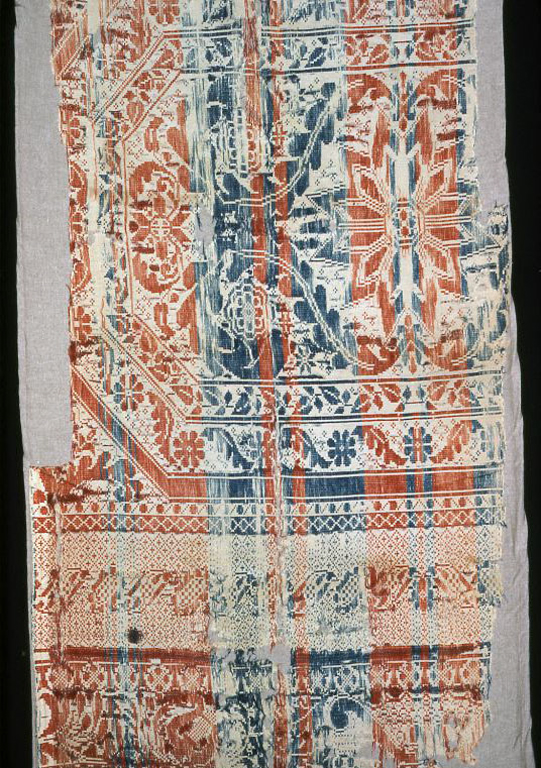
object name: Textile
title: Coverlet (Fragment)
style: 19th century, Arts of the Americas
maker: United States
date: 1875–1900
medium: Cotton and wool, plain weave with plain interlacings of secondary binding warps and patterning wefts (Beiderwand); woven on loom with Jacquard attachment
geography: United States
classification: coverlet; weaving - coverlet; textile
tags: medallions, coverlet, diamond shapes, flowers, foliage